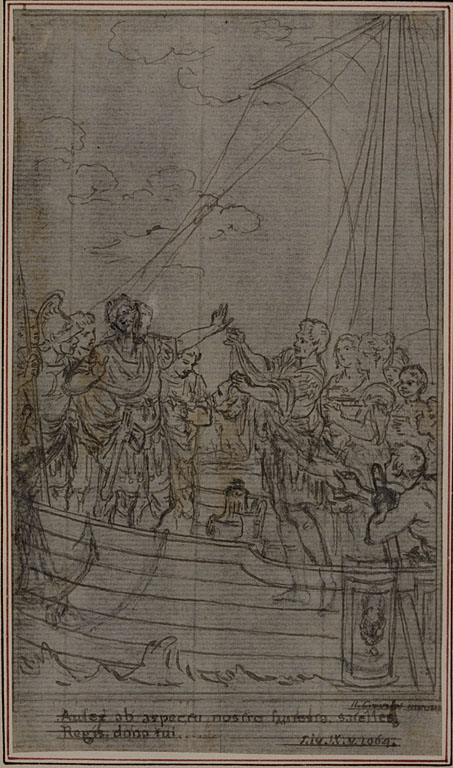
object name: Drawing and Watercolor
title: Study for Lucain's "La Pharsale", Canto IX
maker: Hubert François Gravelot (French, 1699-1773)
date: c. 1766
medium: Pen and black ink, over graphite, on gray laid paper, incised for transfer, and perimeter mounted on gray laid paper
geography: France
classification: pen and ink drawings; drawings (visual works); prints and drawing